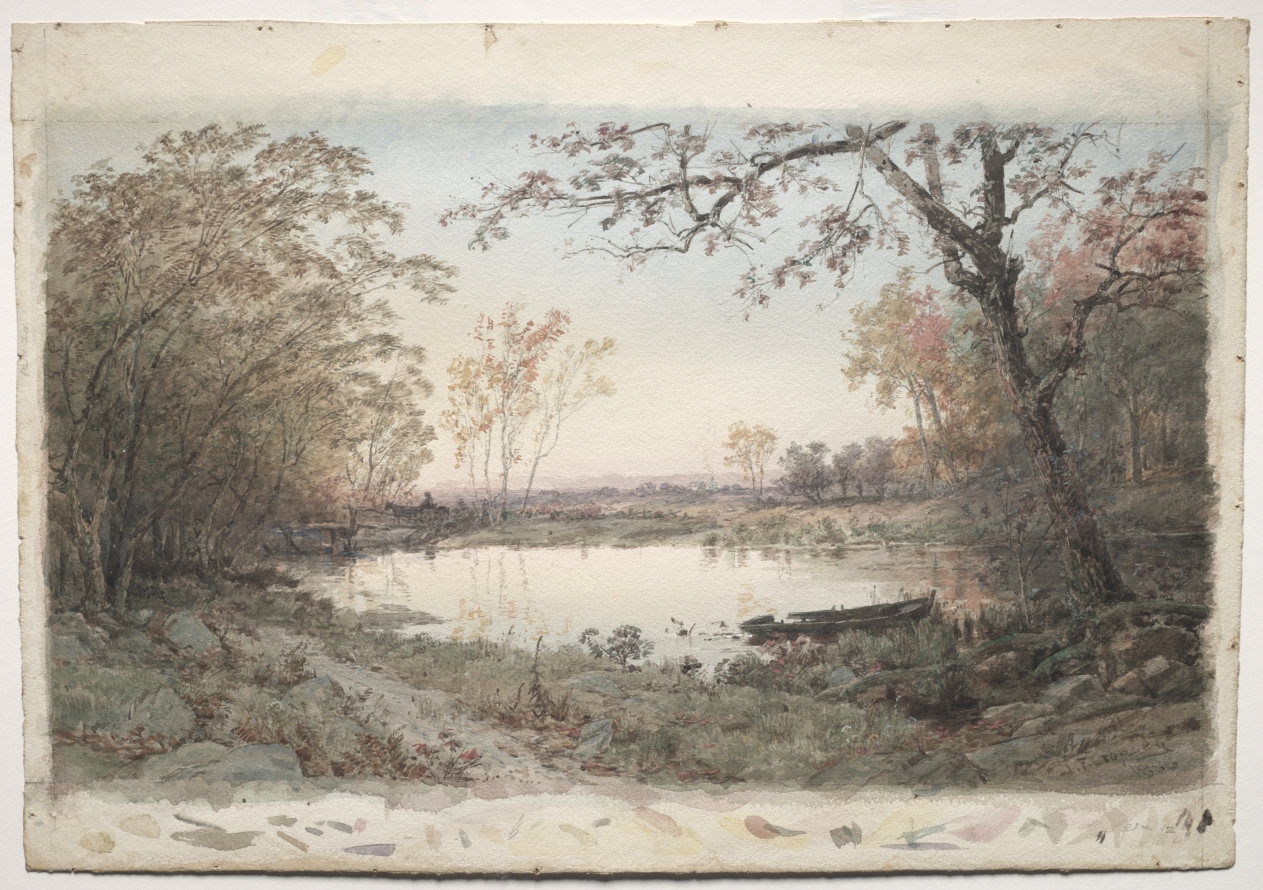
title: Landscape (Hastings-on-Hudson)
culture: America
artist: Jasper F. Cropsey (American, 1823–1900)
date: 1888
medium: watercolor over graphite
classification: Drawing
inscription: lower right, in watercolor: J.F. Cropsey/1888